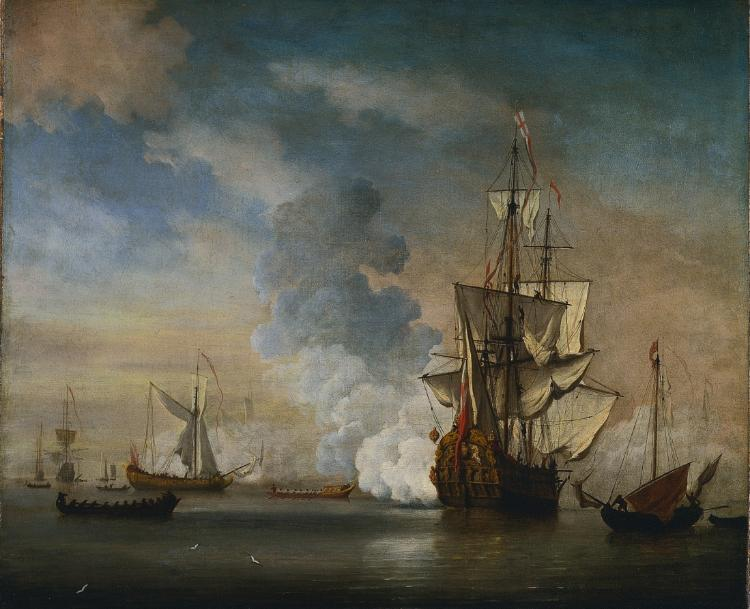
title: English Warship Firing a Salute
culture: Netherlands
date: 1690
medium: oil on canvas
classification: Painting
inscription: Front, lower center near edge, signed and dated in paint Reverse: top stretcher, stencil "360 V"; hand written in pencil "Left"; hand written in pencil (red) "18"; Vertical center bar: Label with hand written pencil "K.L Patterson"; hand written pencil " #5"; Signed lower center: "W. V. Velde J. 1690"; horizontal center bar: hand written w/grease pencil "10120".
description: Van de Velde and his father picked up their lives in Amsterdam in 1672 and moved to England to paint for the king. Their paintings of the Royal Navy’s massive ships celebrated England’s power in war and trade.